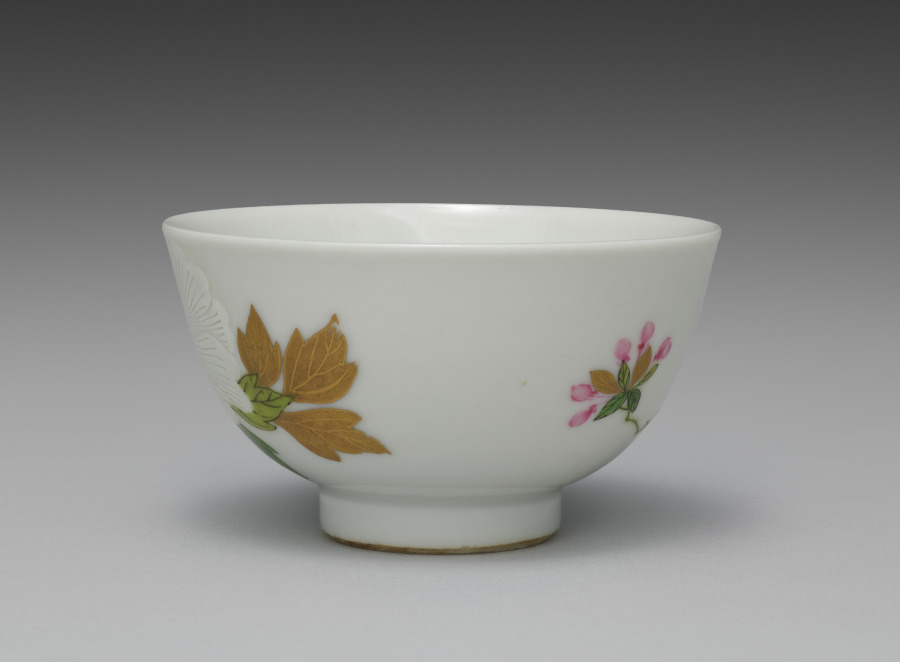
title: Teabowl from Teabowls with Peony and Crabapple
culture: Japan, Meiji period (1868–1912)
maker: Seifū Yohei III (Japanese, 1851–1914)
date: 1893–1914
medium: One from a set of five teabowls; porcelain with underglaze and overglaze color enamels and gold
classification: Ceramic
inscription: 清風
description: Overglaze color enamels are generally called iro-e (literally “color picture”) in the terminology customarily used for porcelain decoration of the Edo period. This set of teabowls is a fine example of Yohei III’s skilled use of the technique, which is identified on this set’s box lid with the alternate phrasing “porcelain with color painting” (jisaiga). Distinct from the way overglaze colors were used in Kakiemon ware from Arita, his designs and applications show a consciousness of porcelain decoration of the Qing dynasty. Here, he combines Chinese models with a sensibility taken from Kyoto ware precedents, including painting with powdered gold (kinrande). The colors used in the bowls are as follows: blue, black, gold, white, light green, green, and pink. The blue appears only inside the footring, as a double band of underglaze color. The black iron, used for stems and leaf veins, is painted over the glaze. The gold, also painted over the glaze, is used for leaves and the centers of flowers, for solid, glossy lines defining detail, or as a semimatte ground. Yohei has incised lines of varying widths into the pigment, carving away to the bowl’s surface, to differentiate individual petals and their rippled shapes. The light and dark greens, as well as the pink, are painted over the glaze. Of note is how Yohei has first used thinly applied lines of light green to draw the plum branch before applying the opaque iron black. For the plum buds and flowers, he has used a diluted pink with an opaque pink for outline, both over the glaze. In his later works, Yohei used pink both over and under the glaze in a manner similar to underglaze blue, and it can be challenging in some cases to discern which technique he has used. A lidded container in a private collection has a similar design but is augmented with the inclusion of white and purple magnolia blossoms. In contemplating the original decorative program of a set, of which these teabowls may have been a part, it is worth considering that perhaps not all objects included the full range of motifs. In such cases, the composition of the individual object may be best understood within the context of the extended ensemble. Here, the delicate pink plum on one side of the bowl seems slightly unbalanced with the bold white peony on the other, but when seen with other objects with the magnolia and its additional colors and shapes, it is possible to imagine a set with a complex, balanced design across multiple pieces.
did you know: The white of the peony flower is built up to a low relief over the glaze.